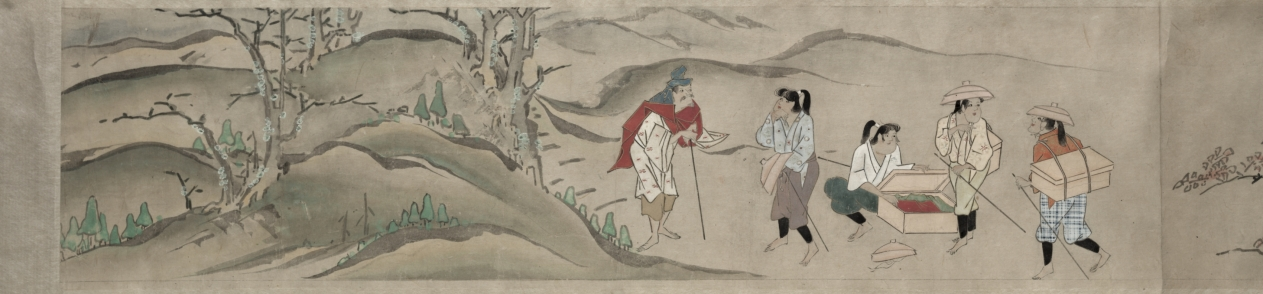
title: The Saltmaker's Story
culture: Japan, Edo period (1615–1868)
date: early 1600s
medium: One of a pair of handscrolls; ink, color, and gold on paper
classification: Painting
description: Once read and copied by girls at New Year’s celebrations and included in dowries, The Saltmaker’s Story is a rags-to-riches tale in which daughters are gifts from the gods. Despite his simple outlook, the main character progresses from humble roots as an associate at Kashima Shrine to the elite status of grandfather of the emperor through the intervention of the Kashima deity. The Saltmaker’s Story is traditionally presented in a set of three scrolls, but the text of this set has been removed by a previous owner, who remounted the illustrations as a pair. The paintings of this one take us from right to left through the first half of the tale.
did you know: This handscroll originally had texts before its paintings, but the texts were removed.